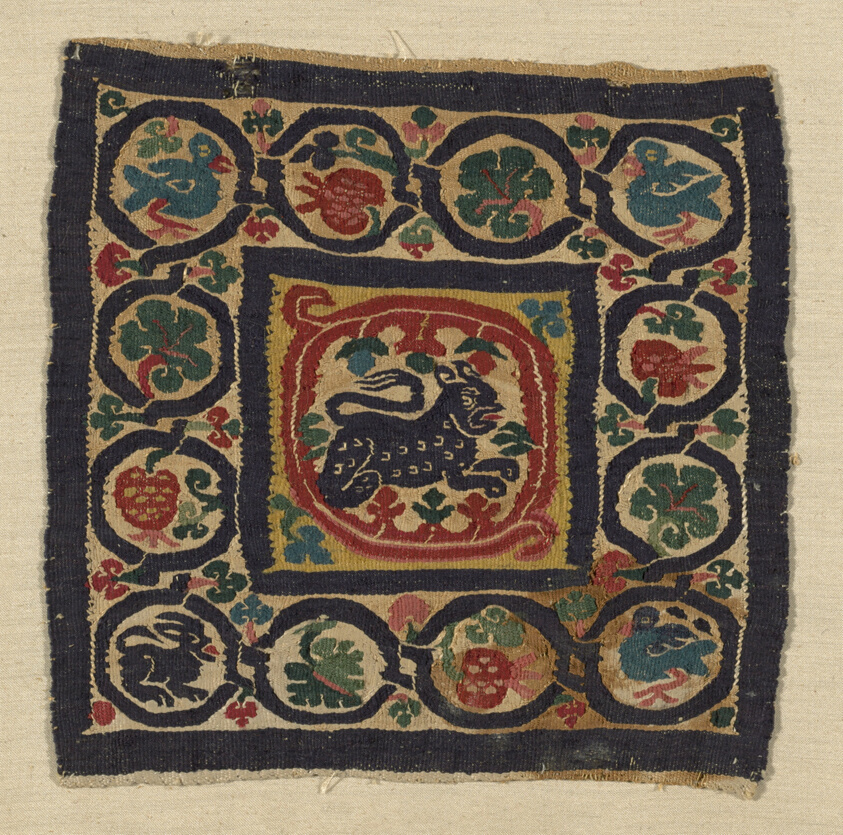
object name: Textile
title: Fragment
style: roman period (egyptian), coptic (period)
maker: Coptic; Egypt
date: Roman period (30 B.C.–641 A.D.), 4th/6th century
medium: Linen and wool, tapestry weave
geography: Egypt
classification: textile; weaving